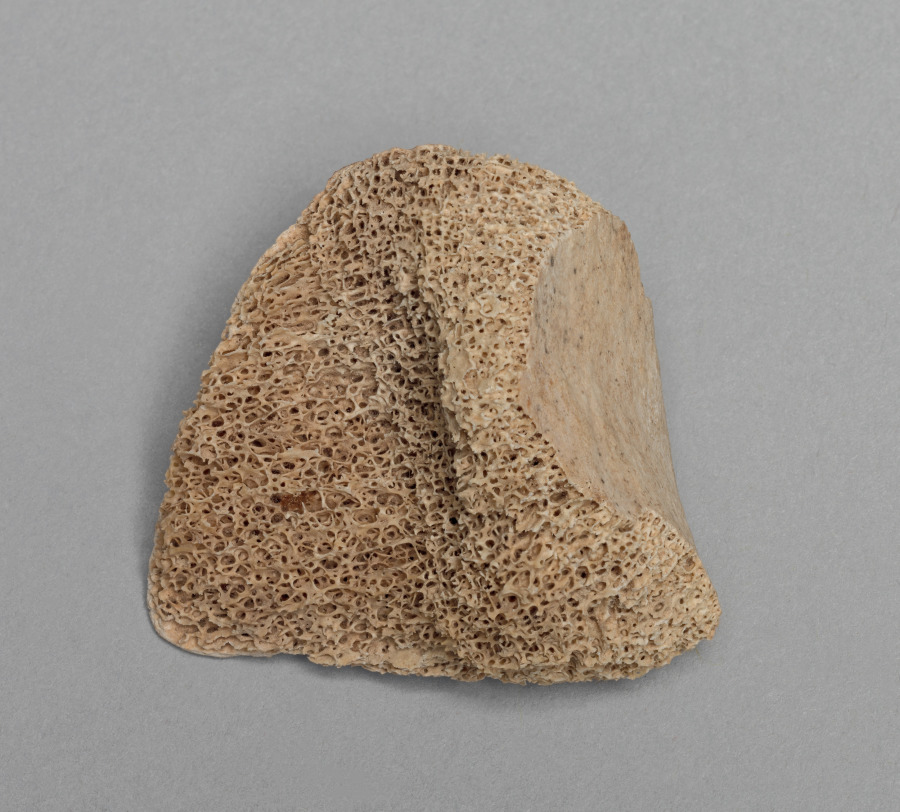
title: Relic of St. Gregory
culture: Germany, Lower Saxony?, Romanesque period, 11th century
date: c. 1045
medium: Bone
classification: Metalwork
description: This relic is housed in the portable altar commissioned by Countess Gertrude of Brunswick, one of the Guelph Treasure’s earliest and most sumptuous objects.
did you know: This bone is a fragment of the proximal tibia or the portion of the shinbone near the top that widens to form the knee joint.